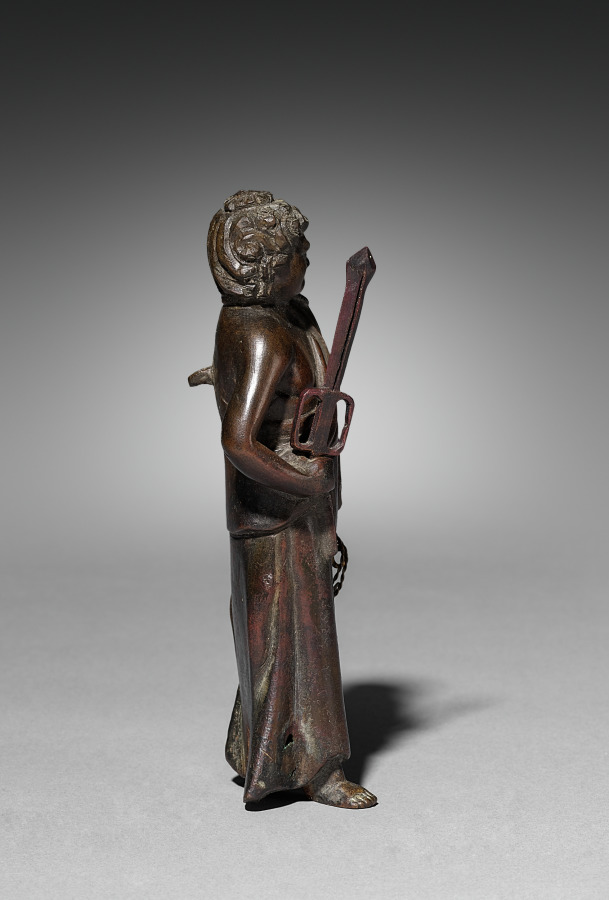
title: Fudō Myōō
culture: Japan, Kamakura period (1185–1333)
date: early 1300s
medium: bronze with wire attachments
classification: Sculpture